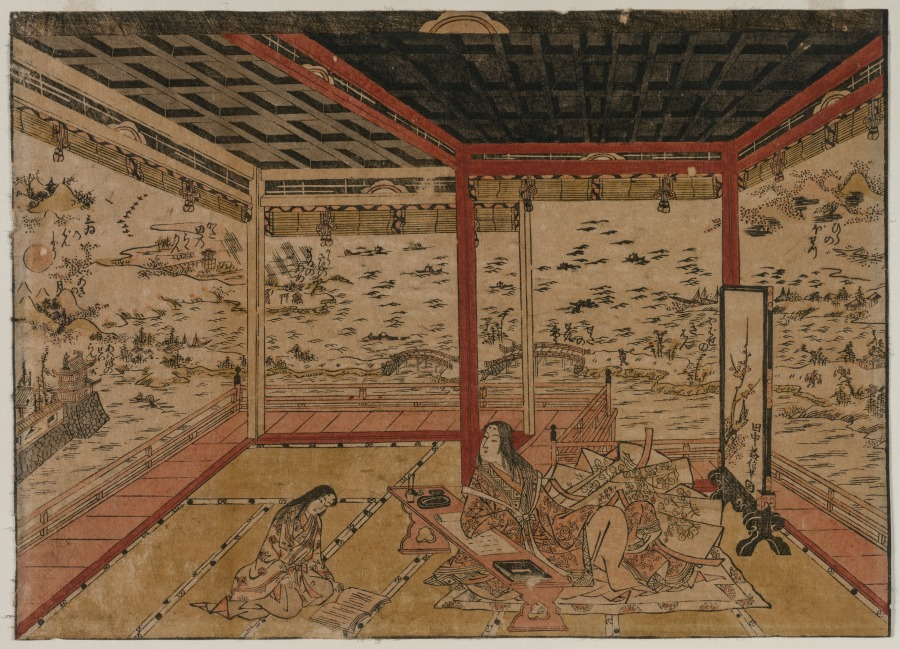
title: Lady Murasaki at Ishiyama Overlooking a Panorama with Eight Views of Lake Biwa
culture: Japan, Edo period (1615–1868)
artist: Okumura Masanobu (Japanese, 1686–1764)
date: 1740s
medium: color woodblock print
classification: Print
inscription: Signature: Tanaka Masunobu hitsu